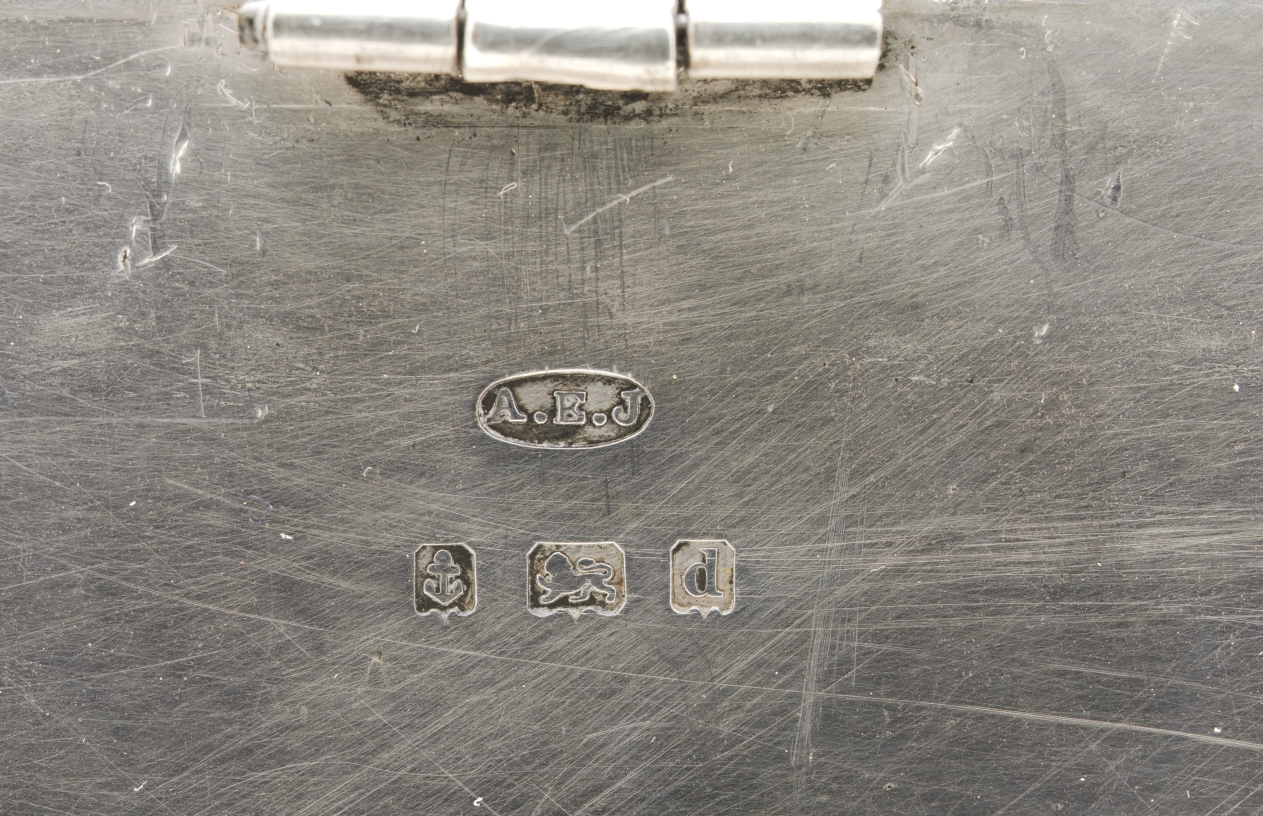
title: Covered Box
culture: England, Birmingham, early 20th Century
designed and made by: A. Edward Jones (British, 1878–1954)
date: 1903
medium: silver, copper, ceramic with wood lining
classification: Metalwork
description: British designer Albert Edward Jones founded A. Edward Jones in 1902, an Arts and Crafts metalworking firm that primarily produced ecclesiastical and domestic objects at the time of this box's creation. The box combines silver and copper metalwork, sleekly designed with limited embellishment.